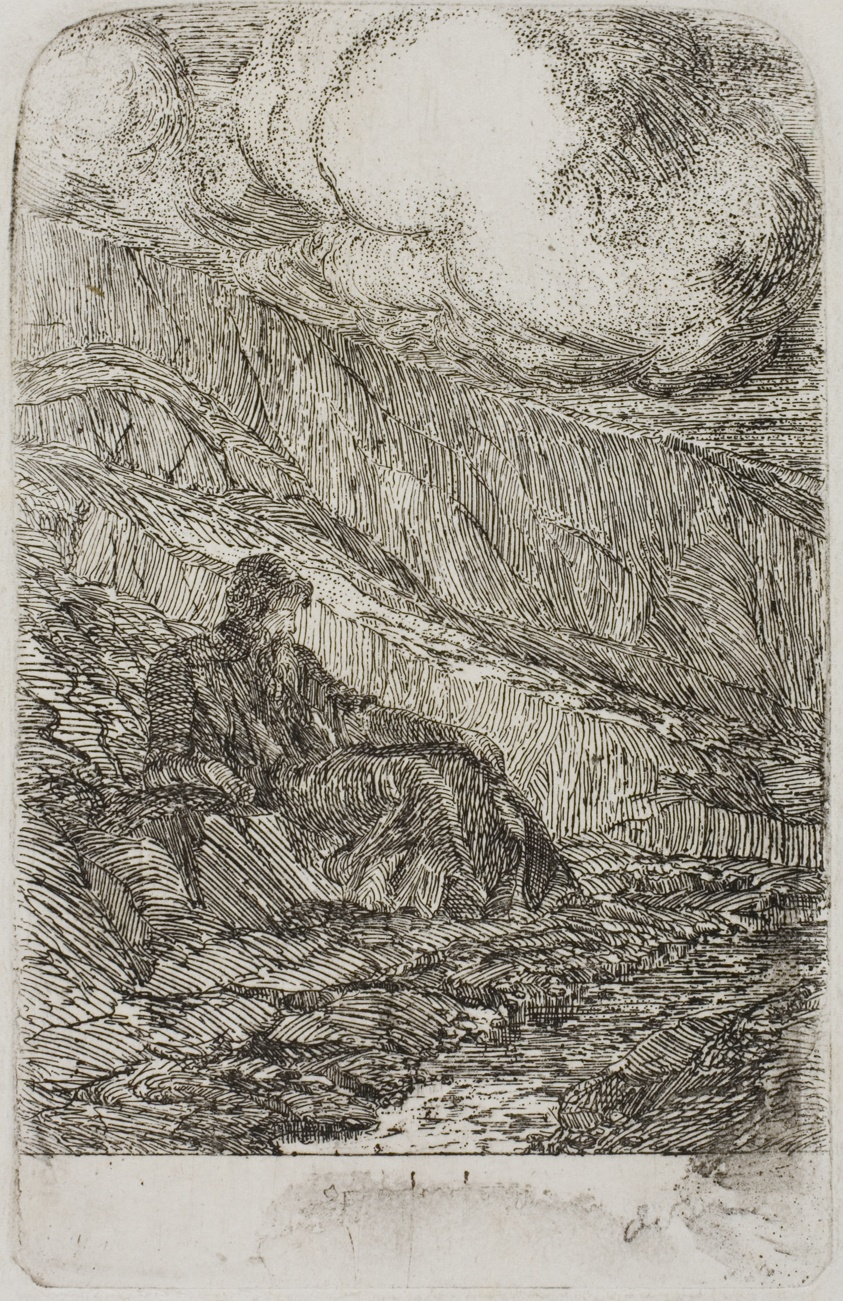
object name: Print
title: Meditation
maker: Odilon Redon (French, 1840-1916)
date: c. 1865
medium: Etching on white wove paper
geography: France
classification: etching; print; prints and drawing; paper